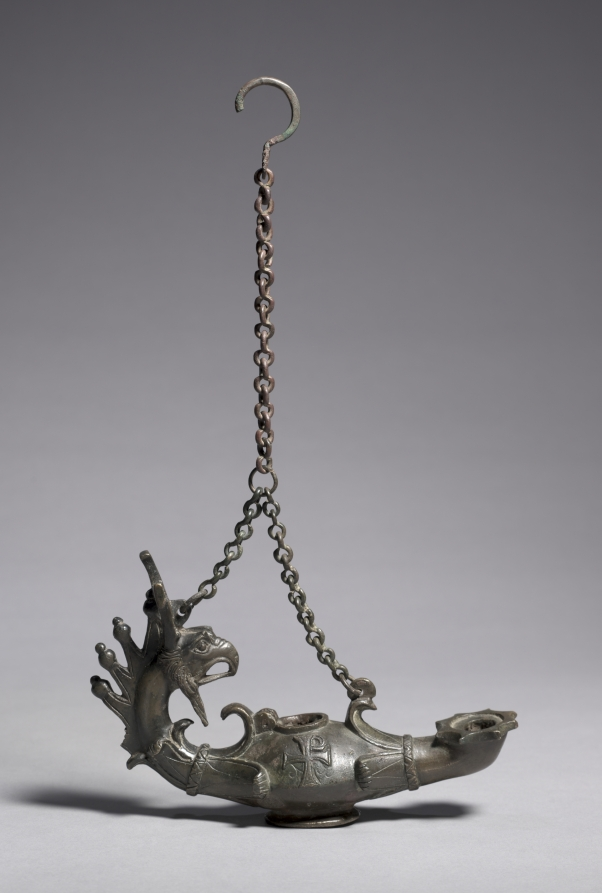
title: Lamp with Griffin-Head Handle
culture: Byzantium, Syria(?), Byzantine period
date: 300s–400s CE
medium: bronze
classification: Metalwork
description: Bronze oil lamps with griffin-head handles and Christian symbolic decoration were common from the 4th through the 6th centuries and have survived in considerable numbers all over the Mediterranean world. The popularity of griffins, ancient mythological creatures with the body of a lion and head and wings of an eagle, is probably rooted in their traditional role as powerful guardian figures and protectors. On this Early Byzantine bronze lamp, the griffin seems to have functioned similarly as a guardian of the flame and a keeper of the light. The decoration of an everyday utilitarian object with both pagan and Christian symbols of protection may mark an effort to enhance its power.